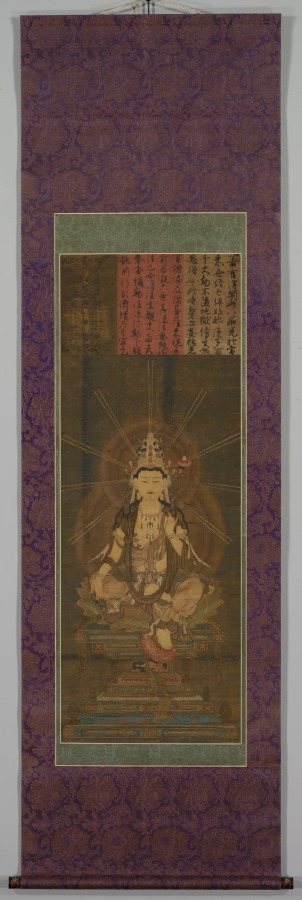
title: Miroku (Maitreya)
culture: Japan, Nanbokuchō period (1336–92)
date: 1300s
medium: Hanging scroll, ink, color, gold, and cut gold on silk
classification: Painting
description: In this image the figure of Miroku, Maitreya in Sanskrit, is richly adorned with gauzy fabrics, opulent jewels, and an intricate gold crown containing five seated Buddhas. Buddhist teachings say that Miroku will descend to Earth as a Buddha to restore Buddhist doctrine at the end of a long period of decline. Here he is represented as a bodhisattva, a being who has attained enlightenment but has chosen to postpone becoming a Buddha to help others reach enlightenment. Above the painting, three inscriptions present portions of a sacred text related to Miroku. A close look at the bodhisattva’s right side where fragile pigments have fallen away reveals writing on the back of the silk on which the image is painted— something its mounters never expected to be seen.